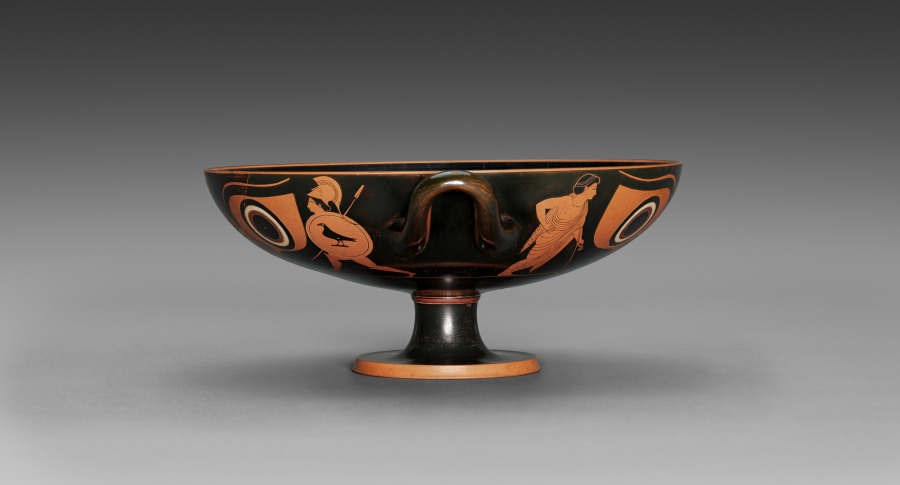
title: Red-Figure Eye Cup: Warriors (A), Musician and Youths (B)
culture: Greek, Attic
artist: attributed to Psiax (Greek, Attic, active c. 525–505 BCE)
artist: and Group of Leipzig T 3599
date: c. 520 BCE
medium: ceramic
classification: Ceramic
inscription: Graffito on underside of foot: Ζωιιλος [ZOILOS, perhaps the name of an owner]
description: Red-figure eye cups, like their more common black-figure brethren (including one in Cleveland), feature two large eyes on either side, producing a masking effect for drinkers. Typically, palmettes flank the eyes, with either a nose or figure at center. Here, the innovative painter Psiax, who worked in both black-figure and red-figure, moved the palmettes to the tondo and created three-figure compositions on each exterior side: two warriors converging on a fallen comrade (or enemy); and a youth playing a cithara for an audience of two. The experimental nature of early red-figure may explain the unusual spear and awkwardly twisted torso and lower leg of the central warrior.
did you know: The fallen warrior’s spear is done with added clay (shaft) and incision (head), not red-figure.